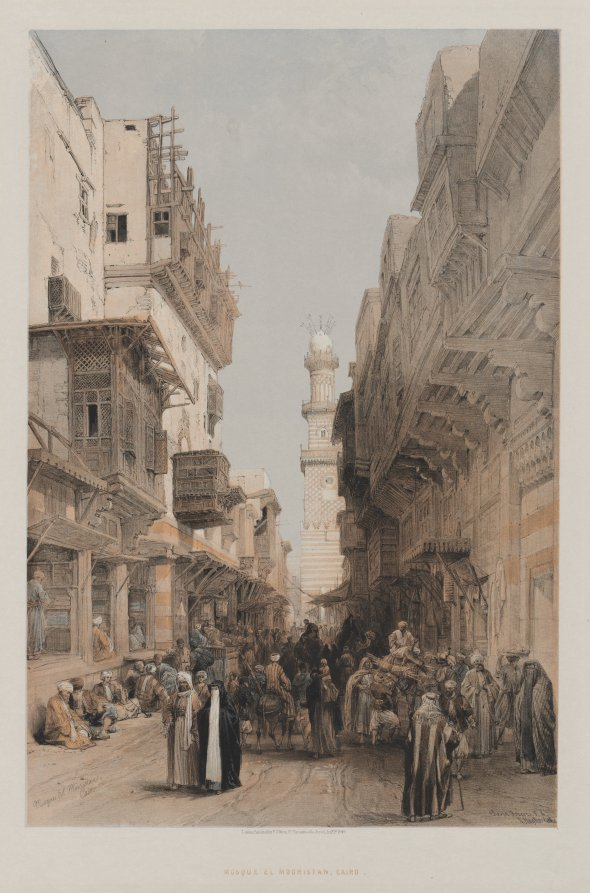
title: Egypt and Nubia, Volume III: Mosque el Mooristan, Cairo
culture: England, 19th century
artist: Louis Haghe (British, 1806–1885)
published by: F. G. Moon, 20 Threadneedle Street, London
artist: after David Roberts (Scottish, 1796–1864)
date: 1849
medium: color lithograph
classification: Print